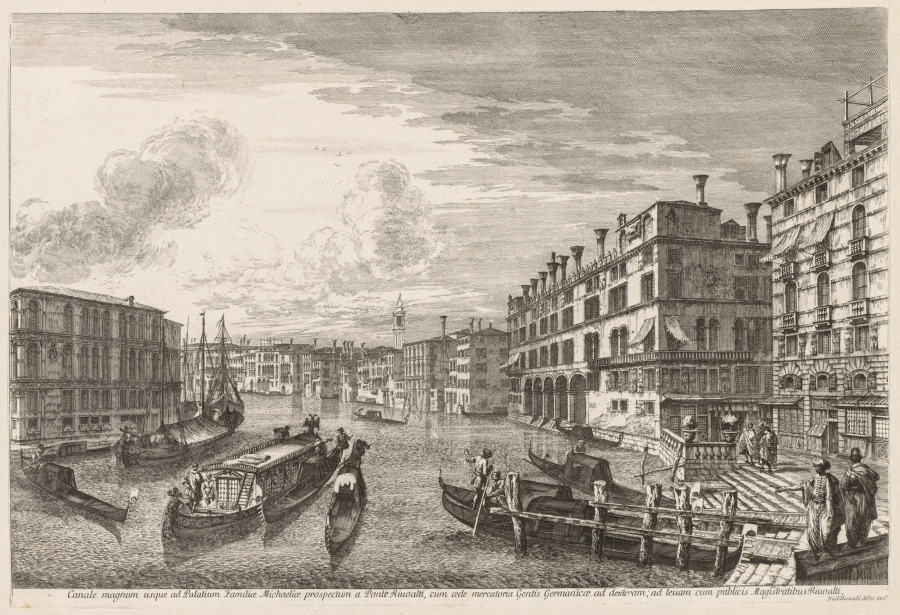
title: Views of Venice: Grand Canal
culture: Italy, 18th century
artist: Michele Marieschi (Italian, 1710–1743)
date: 1741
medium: etching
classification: Print